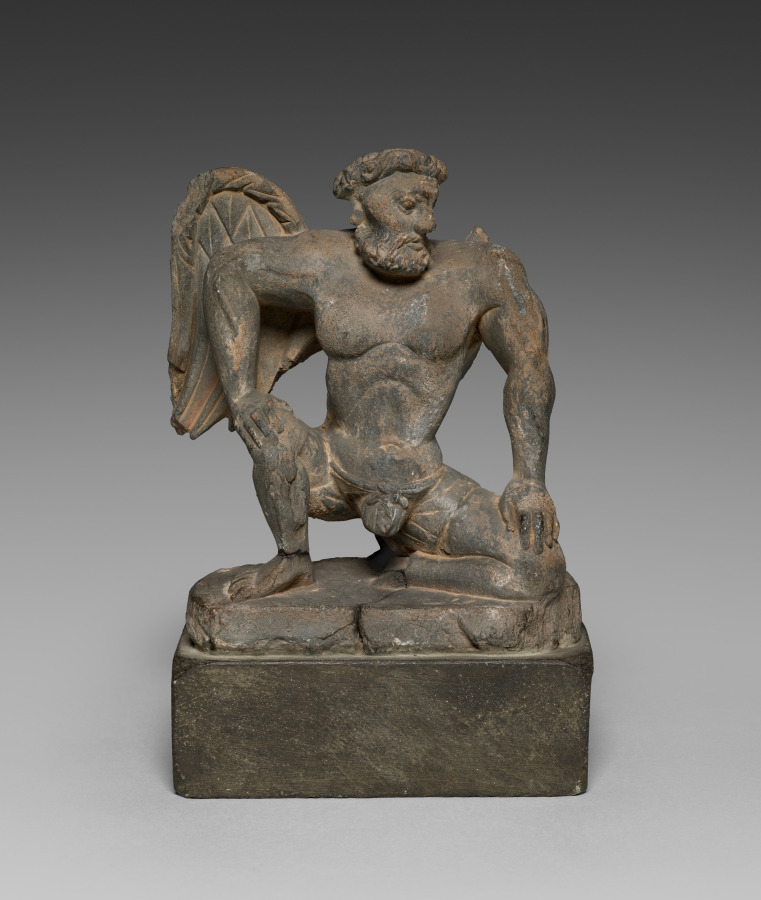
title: Winged Atlas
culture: Pakistan, Gandhara, Kushan period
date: c. 100s–200s CE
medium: gray schist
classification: Sculpture